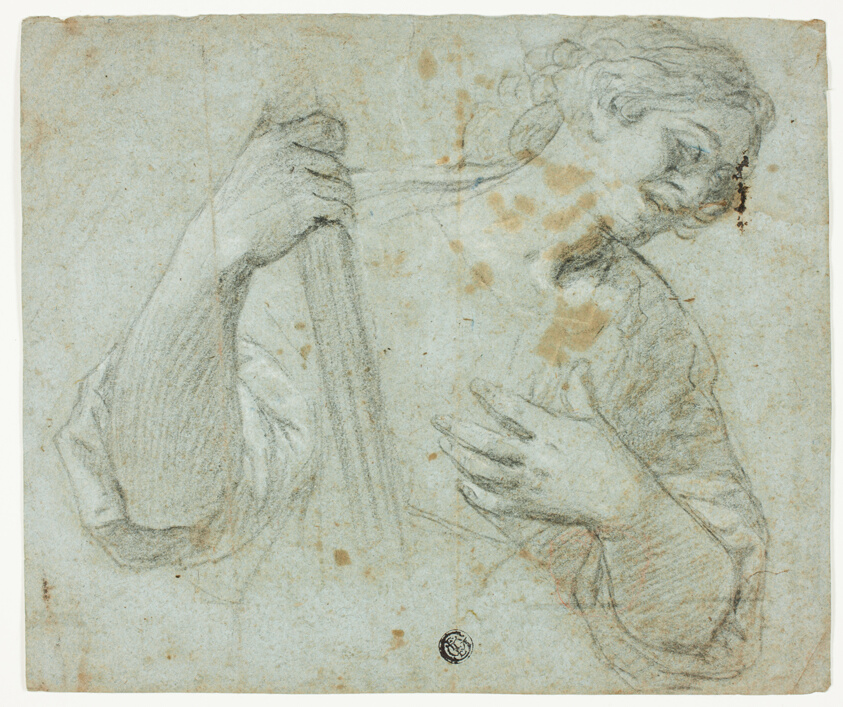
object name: Drawing and Watercolor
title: Standing Youth in Profile to Right, Holding Staff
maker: Probably Domenico Fiasella (Italian, 1589-1669); or possibly Agostino Carracci (Italian, 1557-1602)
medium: Black chalk on cream wove paper, laid down on buff laid paper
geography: Italy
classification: charcoal; drawings (visual works); prints and drawing